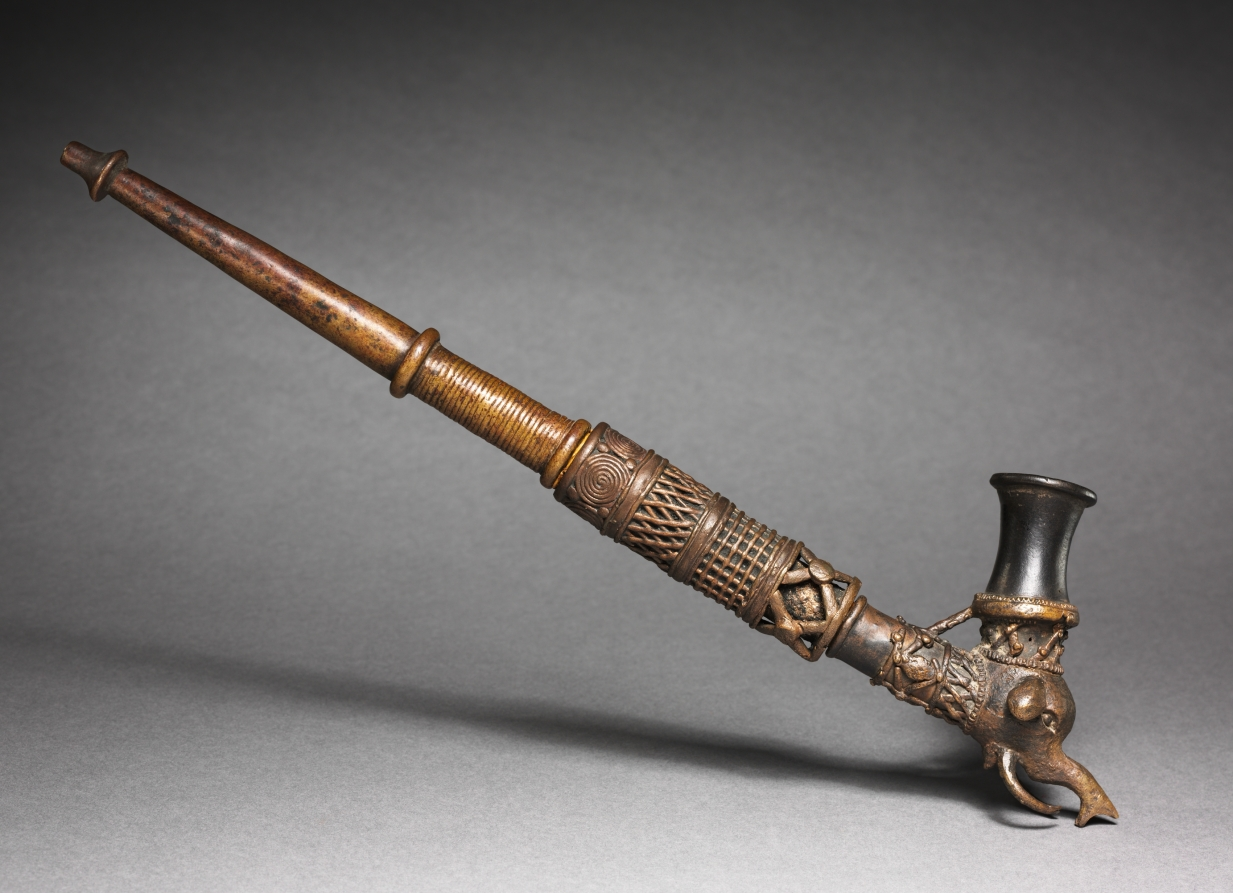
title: Pipe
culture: Equatorial Africa, Cameroon Bagam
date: 1900s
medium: Copper alloy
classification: Implements